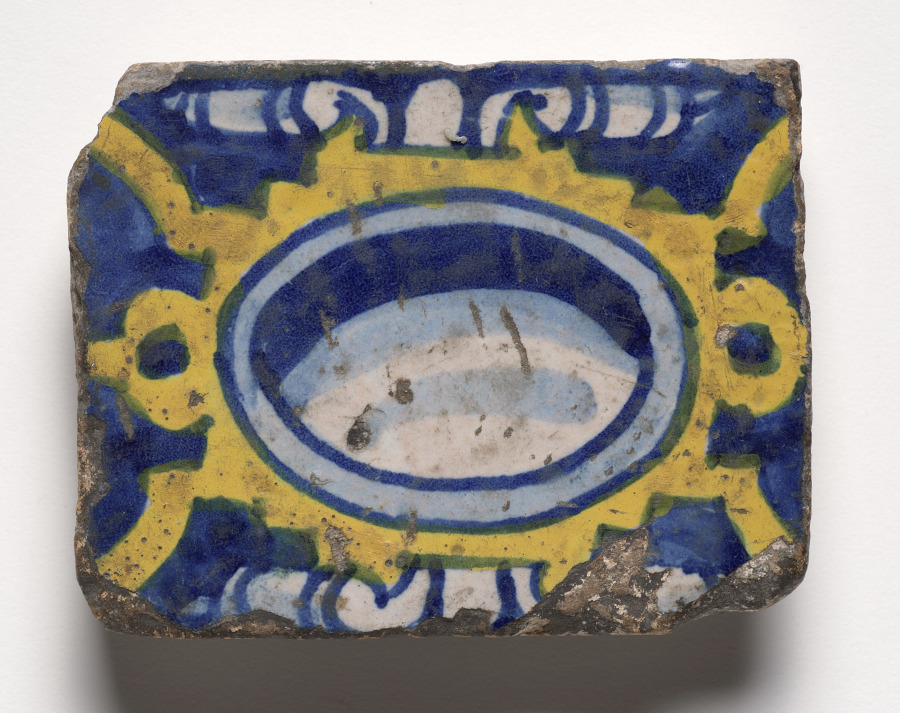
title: Wall Tile–Oval Medallion or Ornament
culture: Spain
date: c. 1600s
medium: glazed ceramic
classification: Ceramic